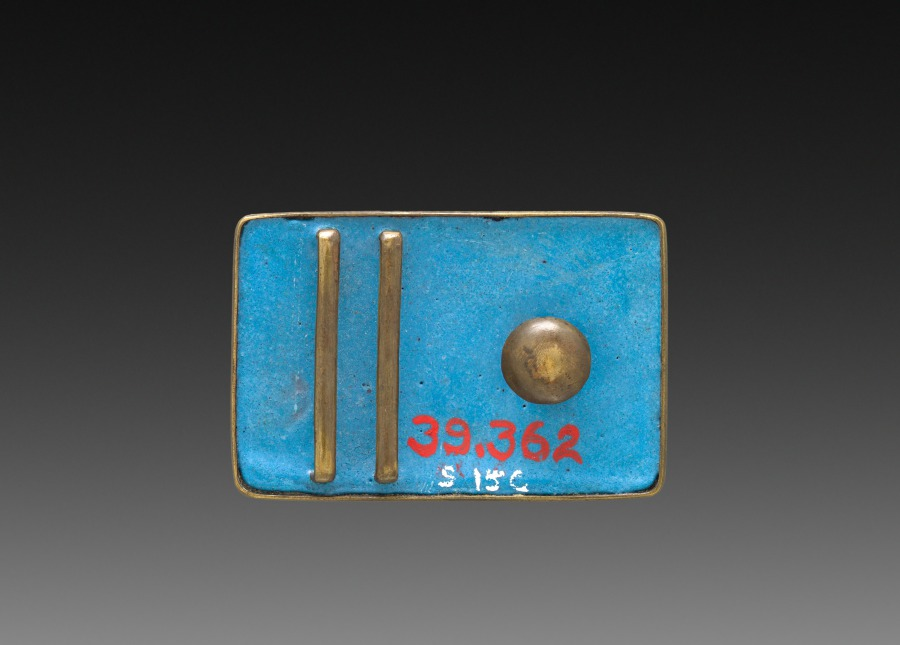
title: Belt Buckle with Flowers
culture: Japan, Meiji period (1868–1912) to Taishō period (1912–26)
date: early 1900s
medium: cloisonne enamel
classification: Enamel